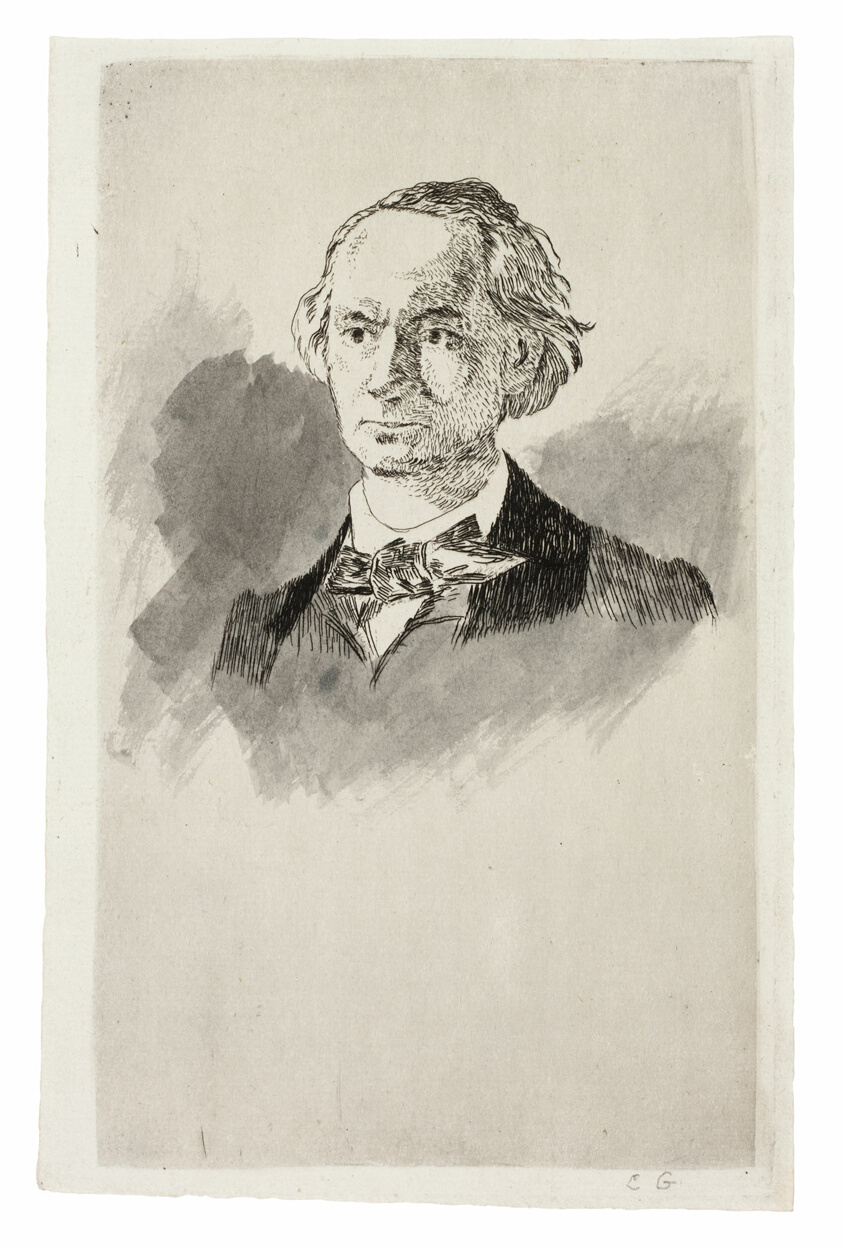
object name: Print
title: Charles Baudelaire, Full Face III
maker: Édouard Manet (French, 1832-1883); after Nadar Gaspard Félix Tournachon (French, 1820-1910)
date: 1868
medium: Etching and plate tone in black heightened with brush and gray wash on ivory laid paper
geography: France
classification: etching; print; prints and drawing